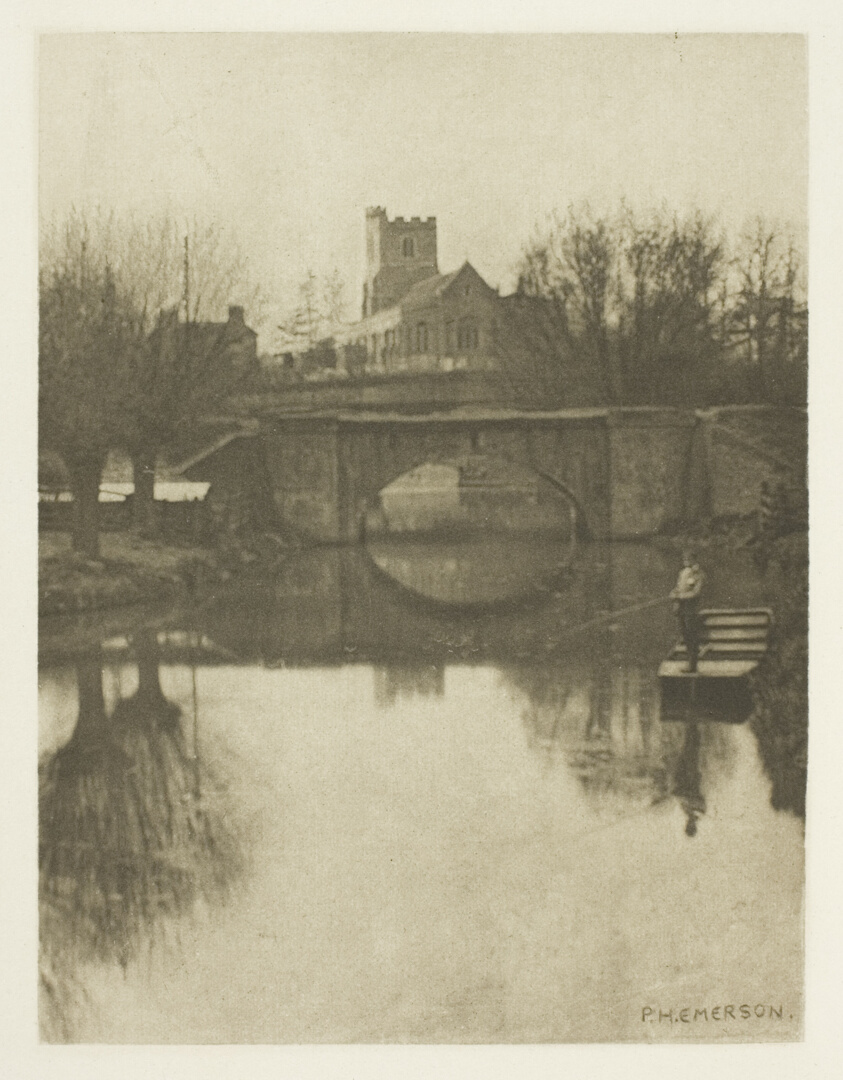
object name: Photograph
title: Broxbourne Church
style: 19th century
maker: Peter Henry Emerson (English, born Cuba, 1856–1936)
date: 1880s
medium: Photogravure, plate XX from the album "The Compleat Angler or the Contemplative Man's Recreation, Volume I" (1888)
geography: England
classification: photogravure; photomechanical process; photography; photograph